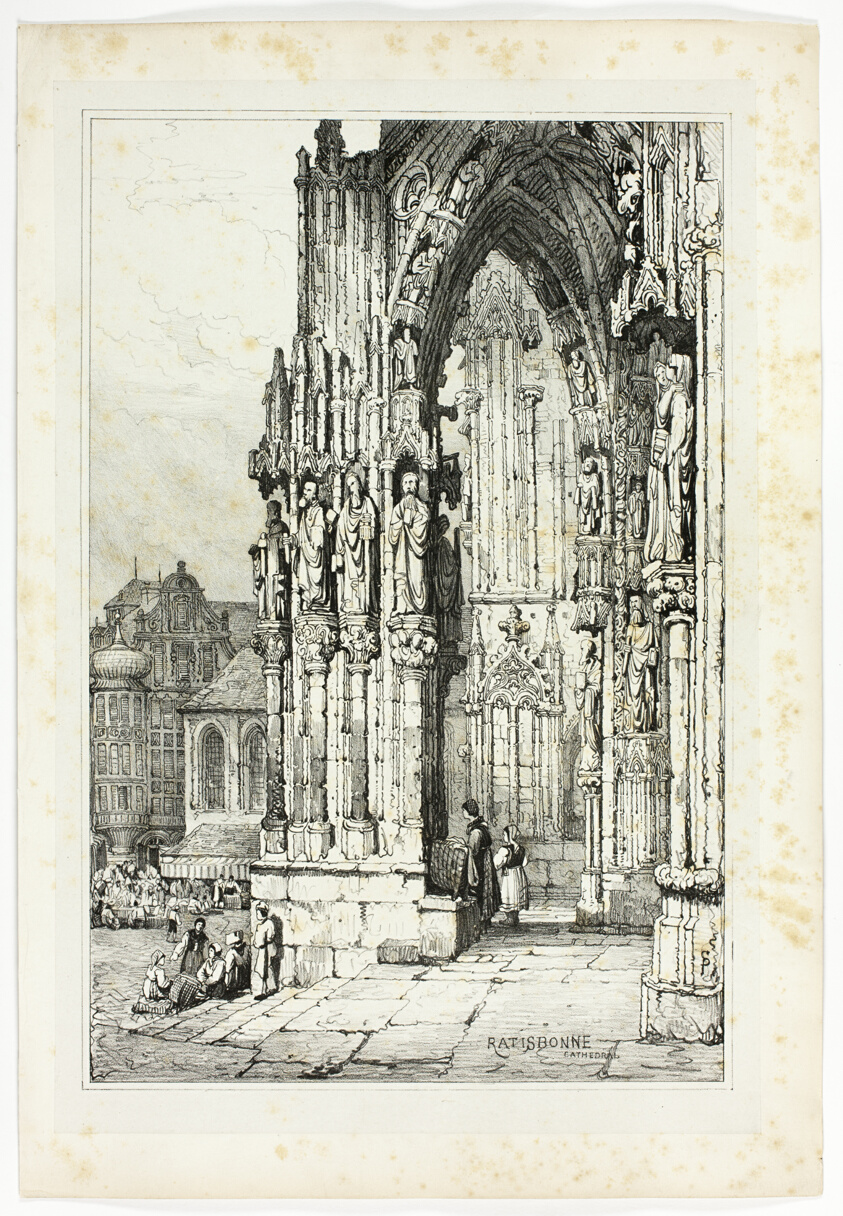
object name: Print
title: Ratisbonne Cathedral, from Facsimiles of Sketches made in Flanders and Germany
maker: Samuel Prout (English, 1783-1852); printed by Charles Joseph Hullmandel (English, 1789-1850)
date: 1833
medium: Lithograph in black on grayish-ivory chine, laid down on ivory wove paper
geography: England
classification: lithograph; print; prints and drawing